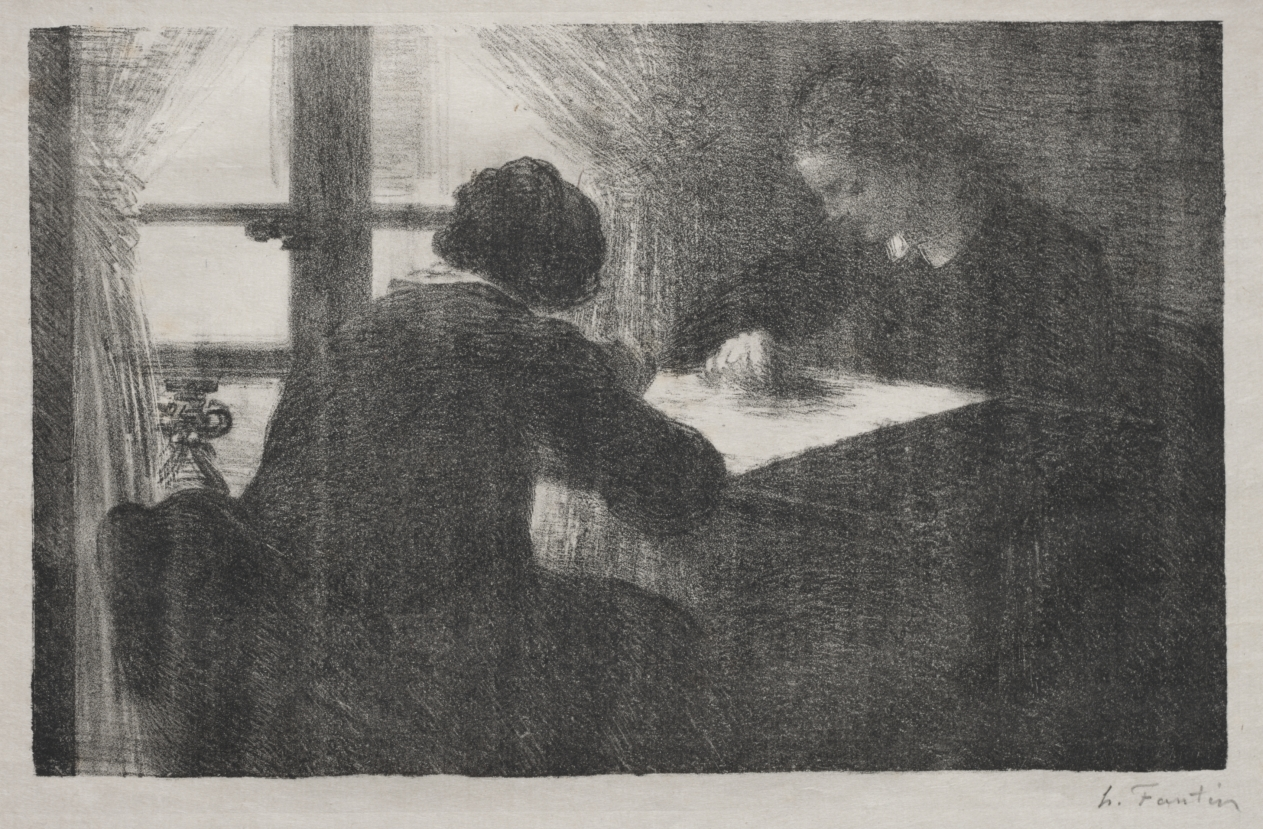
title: The Embroiderers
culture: France, 19th century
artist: Henri Fantin-Latour (French, 1836–1904)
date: 1895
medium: lithograph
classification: Print